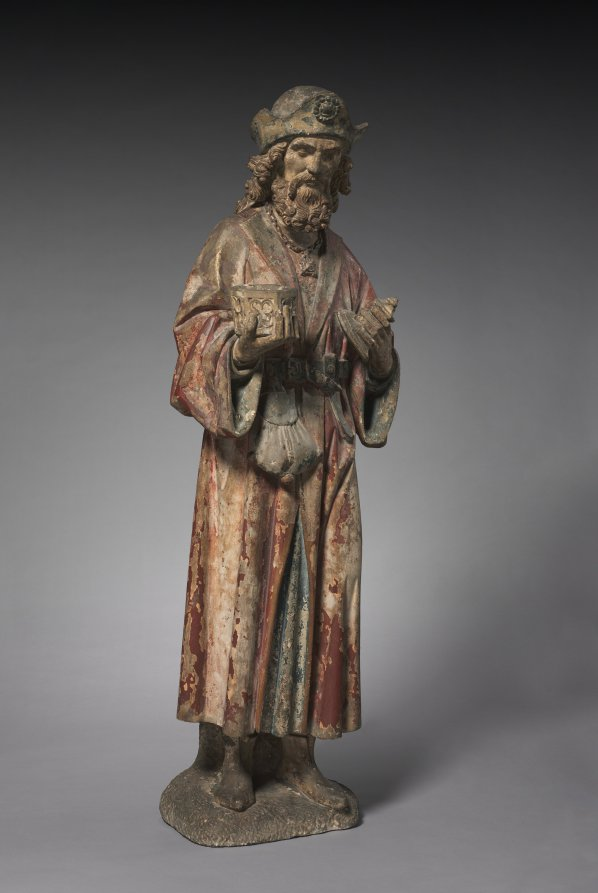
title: Magus from an Adoration Group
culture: France, possibly Champagne, 15th century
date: c. 1460–1475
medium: polychromed limestone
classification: Sculpture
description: This sculpture represents one of the three Magi or kings who witnessed the birth of Jesus. The Magi are identified as Caspar, Melchior, and Balthazar and are typically shown in art bearing their gifts of gold, frankincense, and myrrh. Joseph is often present in these scenes as are shepherds.The single figure shown here was originally part of a sculptural group with many figures. He is shown holding an ornate receptacle with lid. Other figures from the group are not known to have survived, and which Magus the sculpture was intended to represent cannot be clearly established.